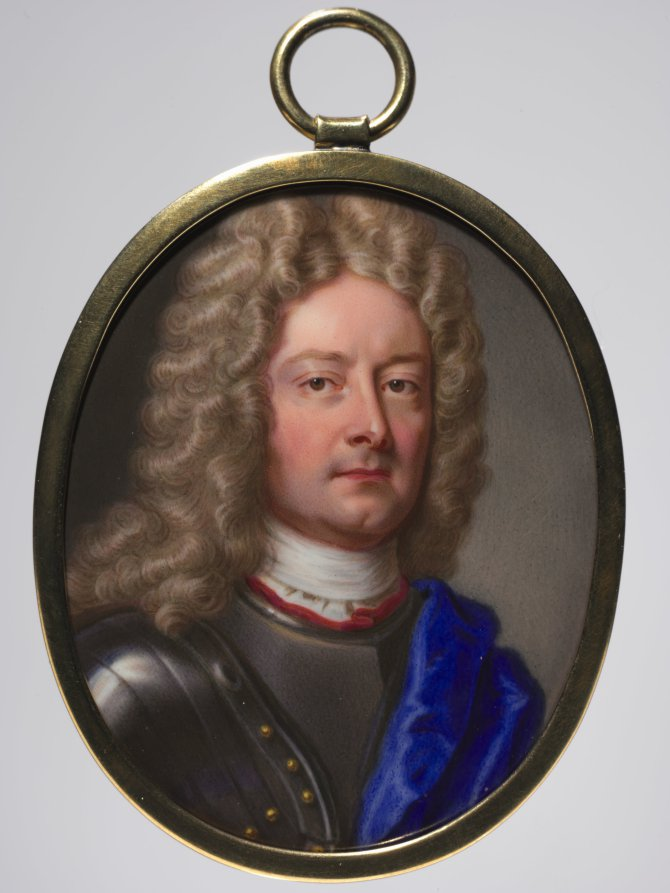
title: Portrait of John Churchill, 1st Duke of Marlborough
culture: England, 18th century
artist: Christian Friedrich Zincke (German, 1683/85–1767)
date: 1715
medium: enamel on copper in a gilt metal frame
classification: Portrait Miniature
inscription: signed on back: CF Zincke fecit/ 1715. [CF in monorgram].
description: Unlike fragile portrait miniatures painted in watercolor on vellum or ivory, which are prone to cracking, fading, and flaking, enamels are resilient, impervious to the effects of light, and retain their striking original colors over time. Partly for this reason enamel was considered ideal for reproducing famous paintings and treasured portraits in a reduced and luminous form. The complicated and labor-intensive process of enameling required the artist to fire numerous layers of colored metal oxide at different temperatures, which made it difficult to produce a faithful portrait likeness, though masters of the medium were able create portraits of remarkable subtlety imbued with the sitter's personality. The heyday of enamel painting was the late 1600s and early 1700s. Among the enamel specialists was Zincke, who worked in England where he was patronized by Queen Anne, King George I, and King George II.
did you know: Although miniatures are often regarded as a private art form exchanged between loved ones, the nature of this enamel was likely political.